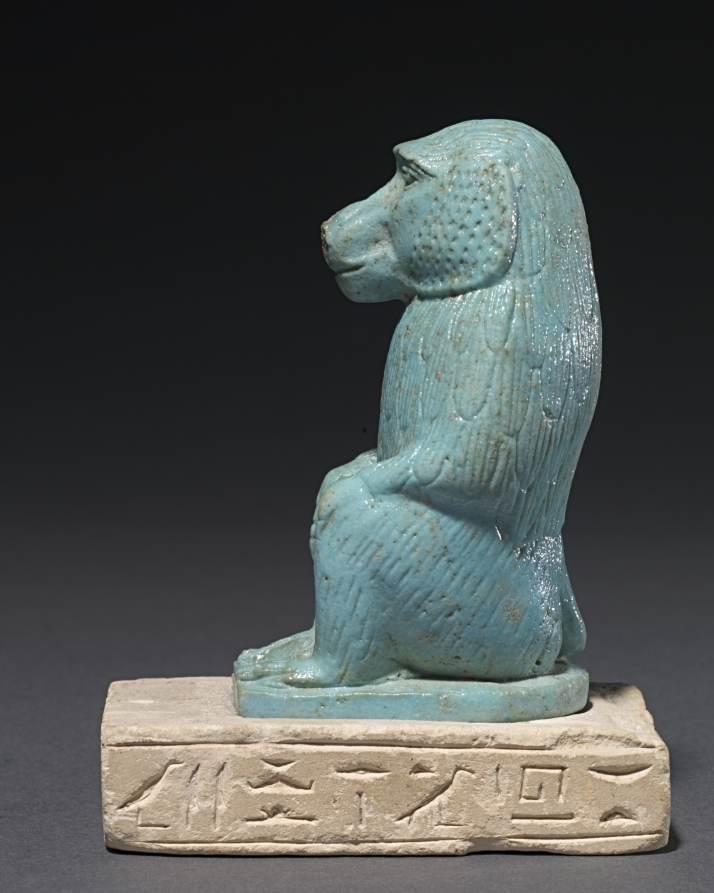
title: Baboon on a Limestone Base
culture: Egypt, Late period (715–332 BCE), Dynasty 30–Greco-Roman period (332 BCE–395 CE), Ptolemaic dynasty (305–30 BCE)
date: 380–30 BCE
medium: pale turquoise faience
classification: Sculpture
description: This finely carved Papio hamadrayas baboon squats low on a base, hands on knees in a traditional pose, copied from nature. Mane and mantle are incised with a scalloped pattern to imitate tufts of fur, and the sides of the face are stippled or dotted. The separate limestone base is ancient; judging by the inscription it does not belong with the statuette, which has been glued onto it in modern times. It reads, "Words spoken by Harpocrates, given life and health, lord of heaven, (on behalf of) Padiuser, the son of Usernakht and [mother's name uncertain]." The baboon is the sacred animal of Thoth, god of the moon and of writing, and guide of the deceased in the underworld. Thoth's cult reached immense popularity in the Late and Ptolemaic periods (the Greeks identified him with Hermes). Statuettes of Thoth as a baboon are common, although not nearly as numerous as presentations of Thoth's other animal manifestation, the sacred Ibis.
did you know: The statuette is made from Egyptian faience and is glazed with a pale, semigloss turquoise.